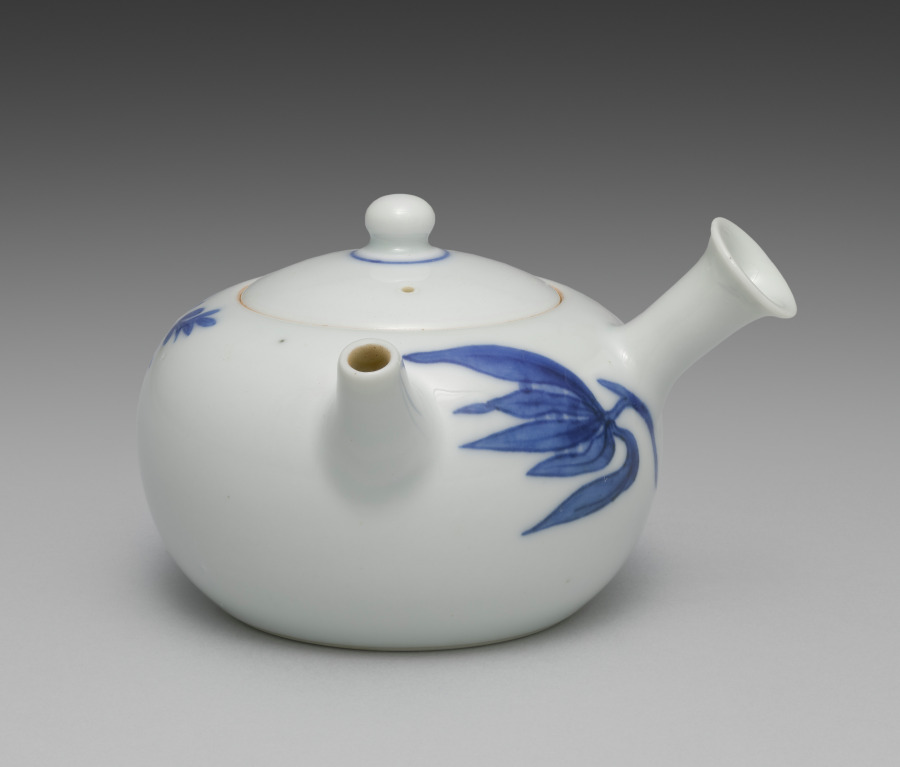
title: Teapot from Tea Set with Orchids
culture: Japan, Meiji period (1868–1912)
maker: Seifū Yohei III (Japanese, 1851–1914)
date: c. 1893–1914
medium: Porcelain with underglaze blue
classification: Ceramic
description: Although the teapot here is stored in a separate box from the five cups, these six pieces may once have been part of a tea set that included other tools such as a water cooler. The teacups have orchid flowers on both sides in underglaze blue, as well as a blue band inside the footring. The teapot has the same design and a blue band painted around the bottom of the lid’s knob. The cups’ long wood storage box is stamped on the exterior, over the lid and base, with a small red seal reading “Satō.” The same seal appears on five small squares of yellow textile, one placed in the bottom of each compartment in the teacup storage box. These are additional to the customary yellow cloths stamped with a “Seifu” seal. Interestingly, four of the Seifū cloths are stamped with an ovoid seal, while the remaining cloth, which is a slightly lighter color, has an unusual seal that is not quite gourd-shaped and with the fū of Seifū in a stylized, unrecognizable form. The teapot has its own box with a Satō seal and is wrapped with an orange textile stamped with the same unusual Seifū seal. A set with a very similar surface design is in the Brooklyn Museum. The Brooklyn set has a water cooler and a small pitcher, in addition to the teapot and cups, and all are in a single storage box. This box records the tea tools as made with kanpakuji, or “bright-jewel white porcelain,” counted among Yohei III’s most important inventions, and carved images. In fact, both sets have a white surface much closer in coloration to the cool white of porcelain clay used in Kyoto at the time, and the designs are simply painted. The Brooklyn set was thus likely mismatched at some point with a box intended for another tea set. Nonetheless, the box may have helped prevent the set’s original components from being dispersed, and the set itself provides insight into how the other tools from the present set may have looked.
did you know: This tea set with orchids has a side-handled pot called a kyūsu, used for steeping, straining, and serving tea.